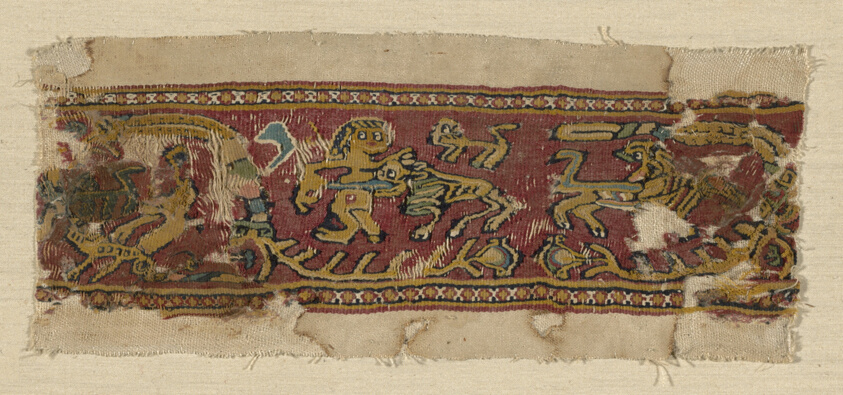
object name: Textile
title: Fragment of a Border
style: roman period (egyptian)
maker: Coptic (Egypt)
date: Roman period (30 B.C.– 641 A.D.)/Arab period (641–969), 6th/7th century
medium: Linen and wool, slit tapestry weave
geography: Egypt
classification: textile; weaving